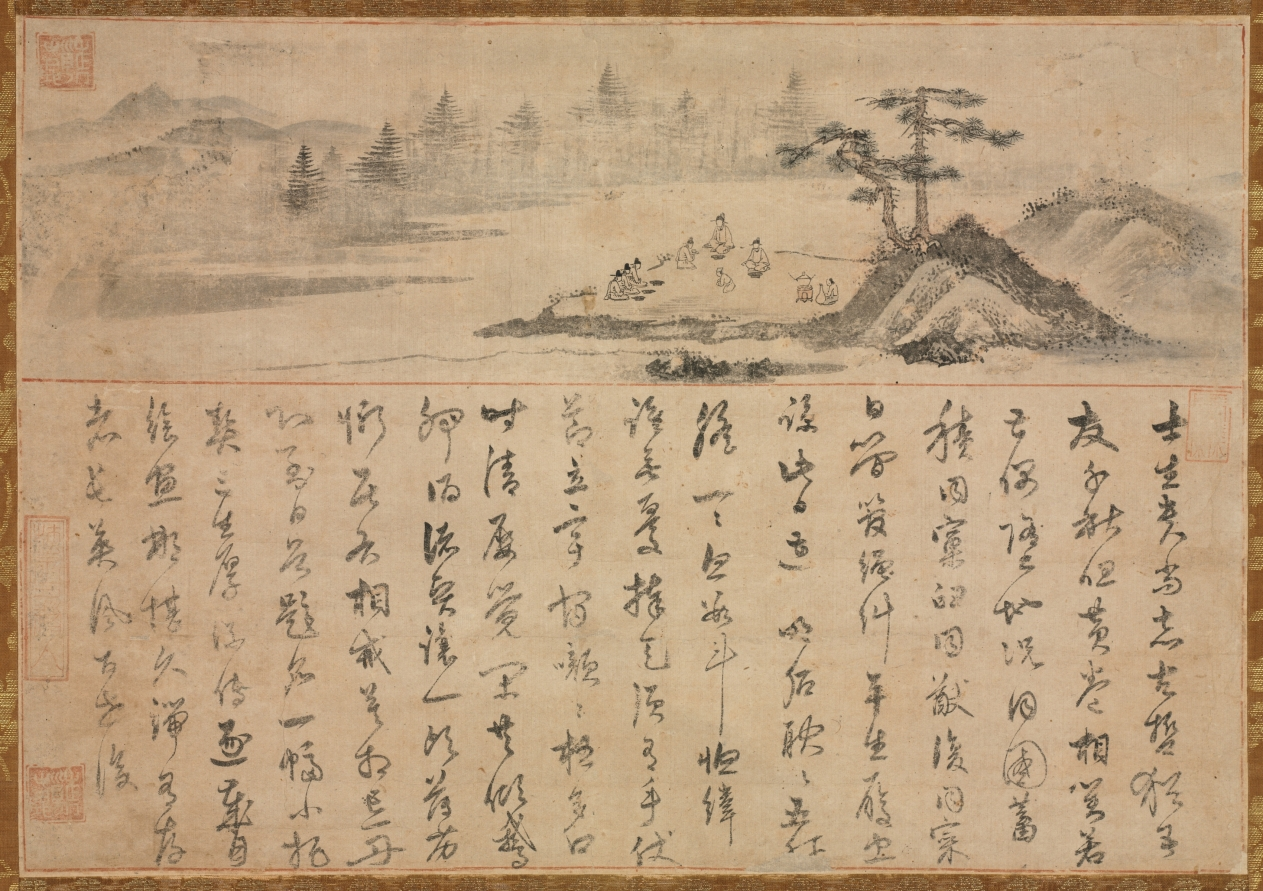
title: Gathering among the Members of Office Censor-General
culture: Korea, Joseon dynasty (1392–1910)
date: 1700s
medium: hanging scroll with calligraphy, ink and light colors on paper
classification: Painting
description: In the early Joseon period, paintings of scholar-officials’ gatherings (gyehoedo) gained popularity among the Korean elite. This painting was commissioned by Sim Eongwang, an official of the Joseon court, to depict a miwon gyehoedo, a gathering of cabinet members (saganwon). This meeting is assumed to have been ordered around the time when Sim was the head of the saganwon in 1530. At the bottom of the painting, he added his poem to express a "literati respect for high spirituality," as stated in the first line. The poem was later recorded in his anthology titled Eochonjip (Book of Fisher Village). This painting itself, however, is an 18th-century copy of the original 16th-century painting.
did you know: The gathering portrayed in this painting took place in the 16th century, but the painting itself is a later copy, possibly of the 18th century.